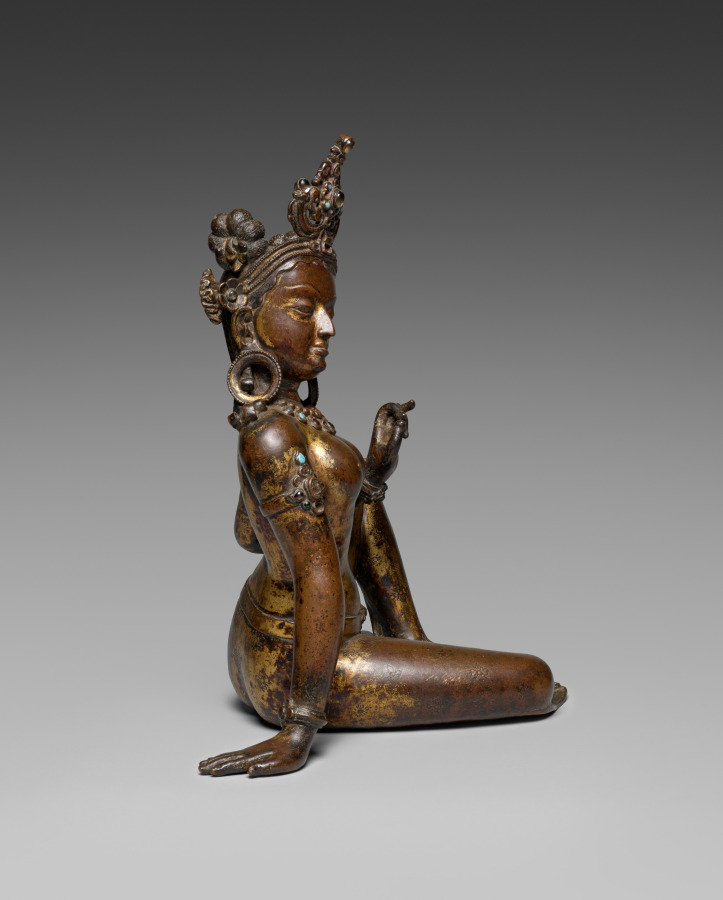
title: Goddess Uma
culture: Nepal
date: 1000s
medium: gilt bronze and semiprecious stones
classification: Sculpture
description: Uma is a mother goddess, and she is depicted here as turning toward her consort, the Hindu god Shiva, a companion sculpture from which this image of Uma has been separated. The grace and femininity of this solid-cast figure are balanced by her confident gesture and expression. She embodies the creative energy of god and the beauty of his creation. In Nepal, Hinduism and Buddhism have continued to flourish simultaneously, in contrast to Tibet, which is predominantly Buddhist, and India, where Buddhism was no longer practiced after the 14th century.